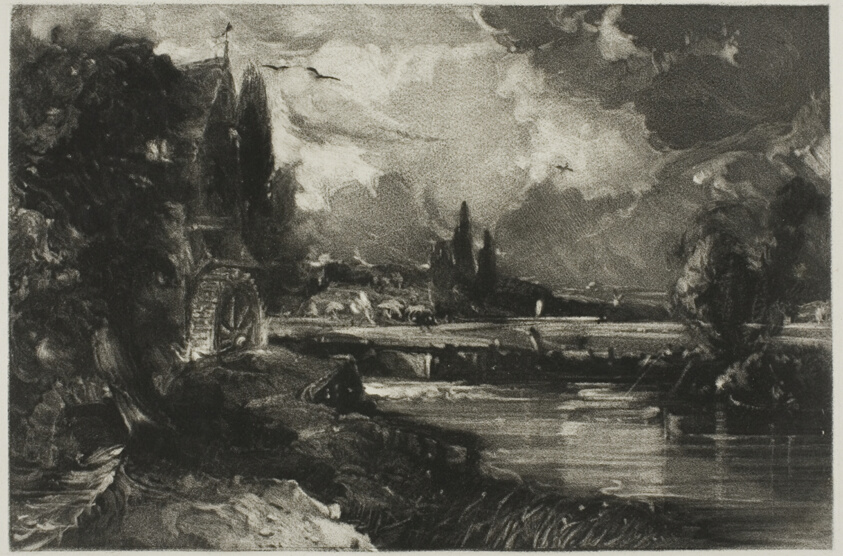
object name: Print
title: A Mill, from English Landscape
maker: David Lucas (English, 1802-1881); after John Constable (English, 1776-1837)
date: 1830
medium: Mezzotint on off-white wove paper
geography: England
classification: mezzotint; print; prints and drawing